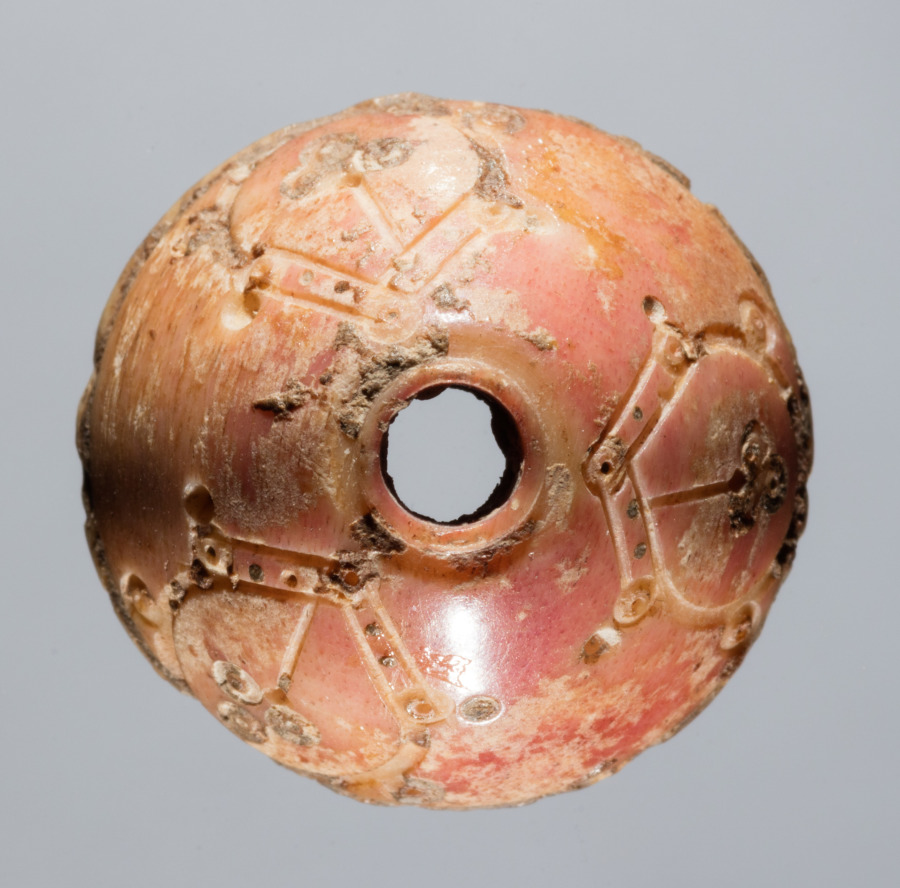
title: Spindle Whorl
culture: Iran, early Islamic period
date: 700s - 900s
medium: bone, incised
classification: Spindle Whorl